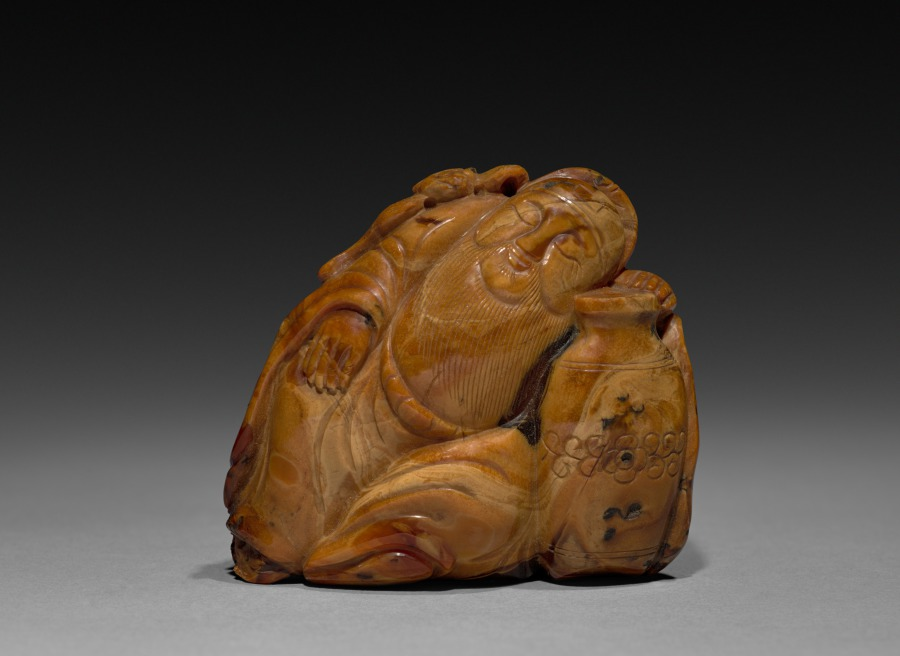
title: Li Taibo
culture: China, Qing dynasty (1644-1911)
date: 1700s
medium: amber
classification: Stone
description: This piece of ochre amber is carved in the round in the form of Li Bai 李白 (701–762), also known as Li Taibai or Li Taibo, 李太白. He was a poet in the golden age of Chinese poetry. Around a thousand poems are attributed to him. Li’s eyes are closed, an arm wrapped around his wine jar, in a drunken sleep. Perched on his shoulder is a bat, considered a lucky symbol as the Chinese word for bat, 蝠 fú, is pronounced the same as “good fortune” 福. Deer, like the one nestled behind Li, traditionally symbolize longevity and prosperity. These auspicious symbols create a bittersweet contrast with the legendary story that Li drowned while drunk when reaching to grasp the moon's reflection in the river.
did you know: Li Bai was one of the Eight Immortals of the Wine Cup, Tang dynasty scholars who enjoyed drinking alcohol.